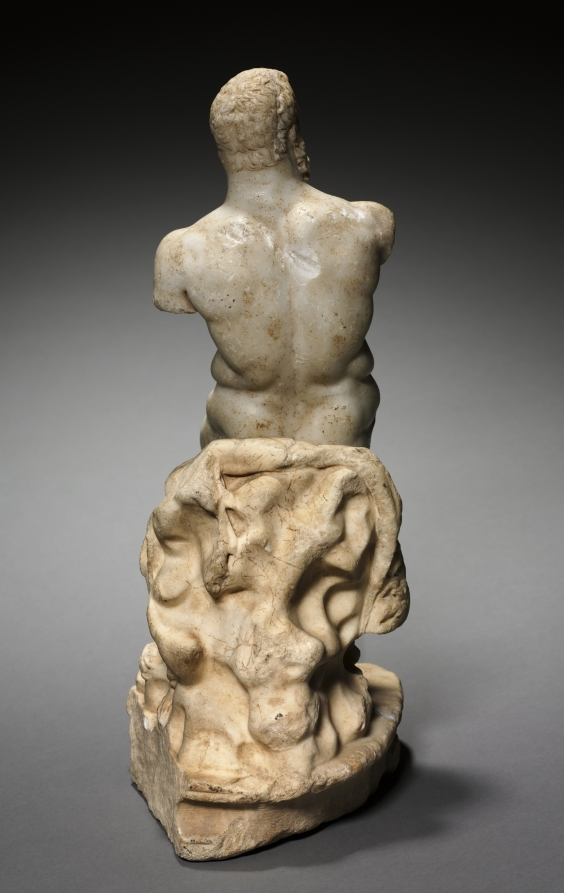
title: Herakles Epitrapezios (Hercules of the Table)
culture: Italy, Roman, Alexandrian(?)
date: 1–100 CE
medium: marble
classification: Sculpture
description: The Roman poets Martial and Statius mention a bronze statuette made by the master Greek sculptor Lysippos (active c. 360s-310s BC). It depicted the Greek hero Herakles seated on a rock with a drinking cup and was created for Alexander the Great, who claimed Herakles as an ancestor and carried the sculpture with him on his military campaigns. Later, the work was said to have been acquired by Hannibal, Sulla, and the famed Roman art collector Novius Vindex. The statuette is called epitrapezios (on the table) either because it was designed to be displayed on a tabletop or because it shows Herakles seated, as at a table. Later sculptors made many more versions, including this one, to meet the demand of Roman collectors enamored with Greek art.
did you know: The sculptor carved Herakles and his rocky seat (covered with his lionskin) from separate marble pieces.